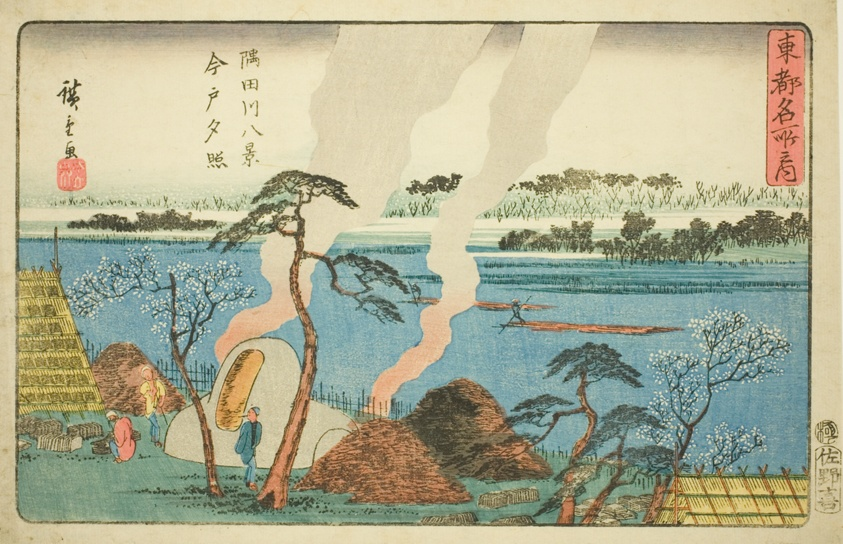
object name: Print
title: Evening Glow at Imado, Eight Views of the Sumida River (Sumidagawa hakkei, Imado sekisho), from the series "Famous Places in the Eastern Capital (Toto meisho no uchi)"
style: Japanese (culture or style)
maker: Utagawa Hiroshige 歌川 広重; Japanese, 1797-1858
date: c. 1840/42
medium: Color woodblock print; aiban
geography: Japan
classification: woodblock print; print; asian art